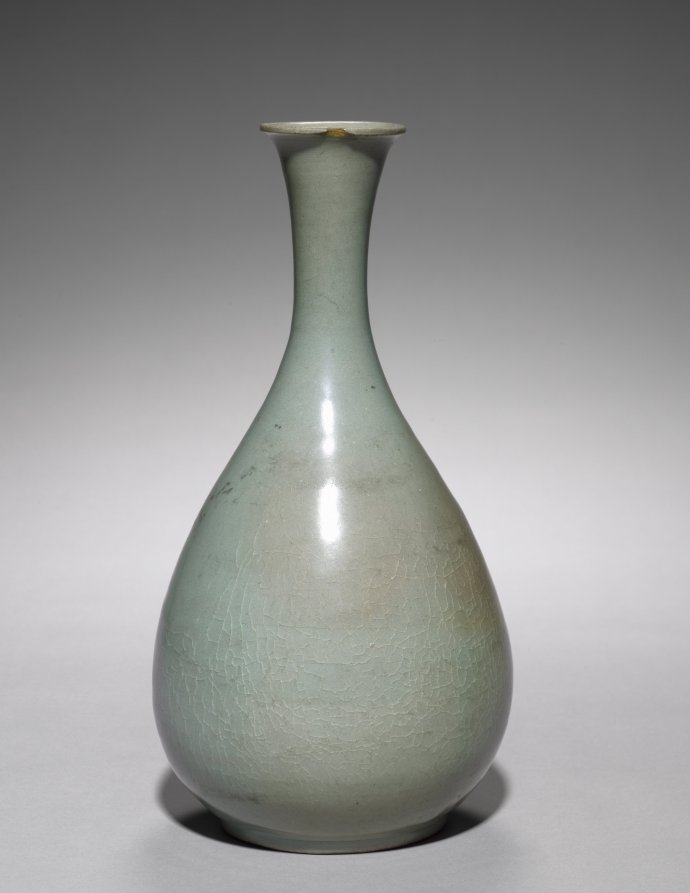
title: Bottle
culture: Korea, Goryeo dynasty (918–1392)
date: 1100s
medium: celadon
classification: Ceramic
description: As early as the seventh century, the practice of drinking tea and wine became an important part of elite culture in Korea. Elites of the Goryeo period commissioned a variety of types of utensils and vessels including this wine bottle, not only to make their drinking experience more exciting.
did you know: The distinctive bluish and greenish glaze of Goryeo celadons, shown in this bottle, is the result of distinctive small and long Korean kilns, which maintained a low oxygen saturation with a high level of carbon dioxide.